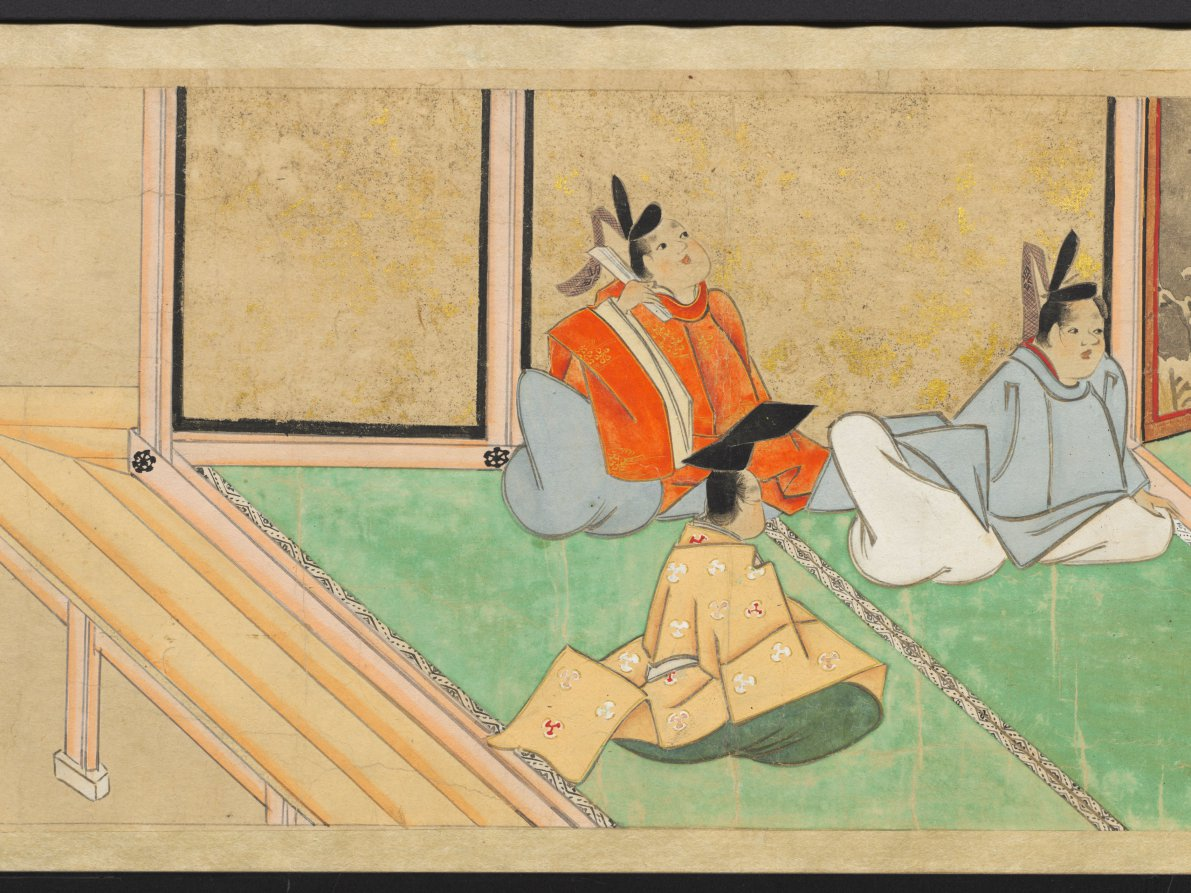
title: The Saltmaker's Story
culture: Japan, Edo period (1615–1868)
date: early 1600s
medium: One of a pair of handscrolls; ink, color, and gold on paper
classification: Painting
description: Once read and copied by girls at New Year’s celebrations and included in dowries, The Saltmaker’s Story is a rags-to-riches tale in which daughters are gifts from the gods. Despite his simple outlook, the main character progresses from humble roots as an associate at Kashima Shrine to the elite status of grandfather of the emperor through the intervention of the Kashima deity. The Saltmaker’s Story is traditionally presented in a set of three scrolls, but the text of this set has been removed by a previous owner, who remounted the illustrations as a pair. The paintings of this one take us from right to left through the first half of the tale.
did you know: This handscroll originally had texts before its paintings, but the texts were removed.